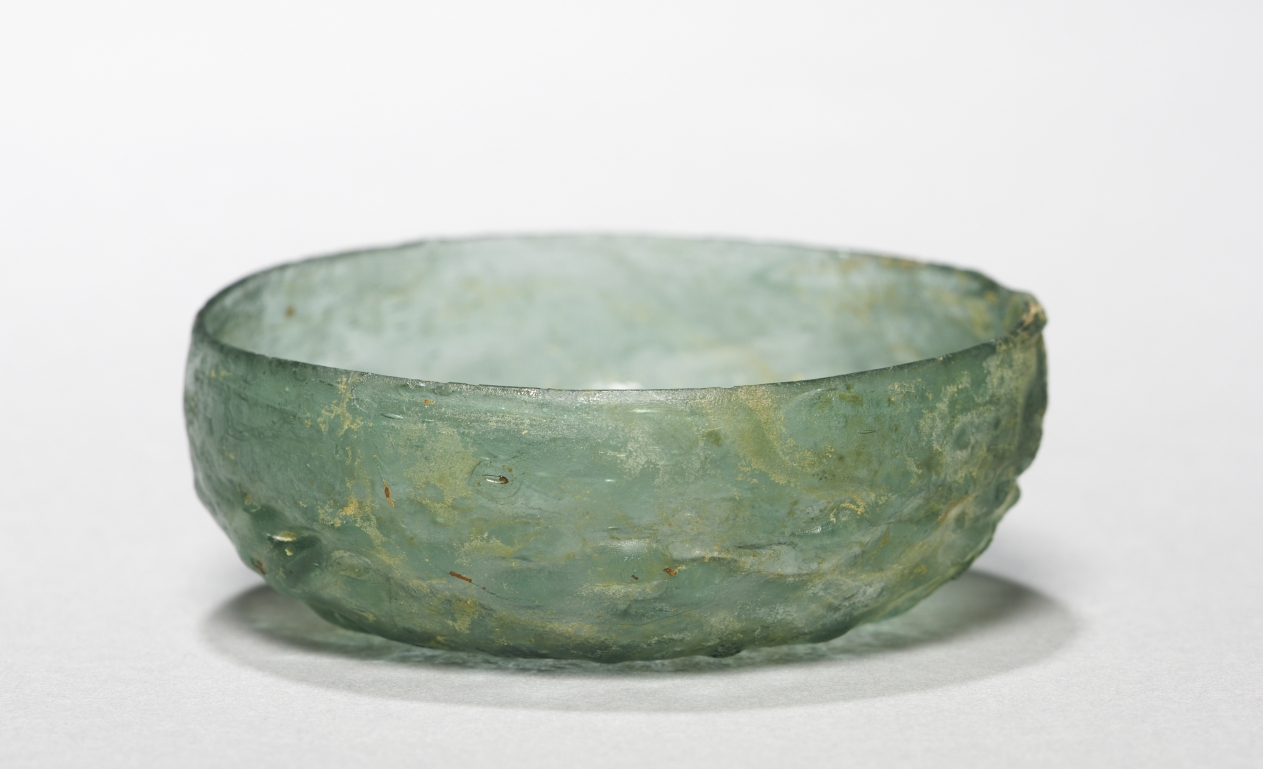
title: Bowl (Maigelein)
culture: Germany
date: 1400s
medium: green glass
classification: Glass